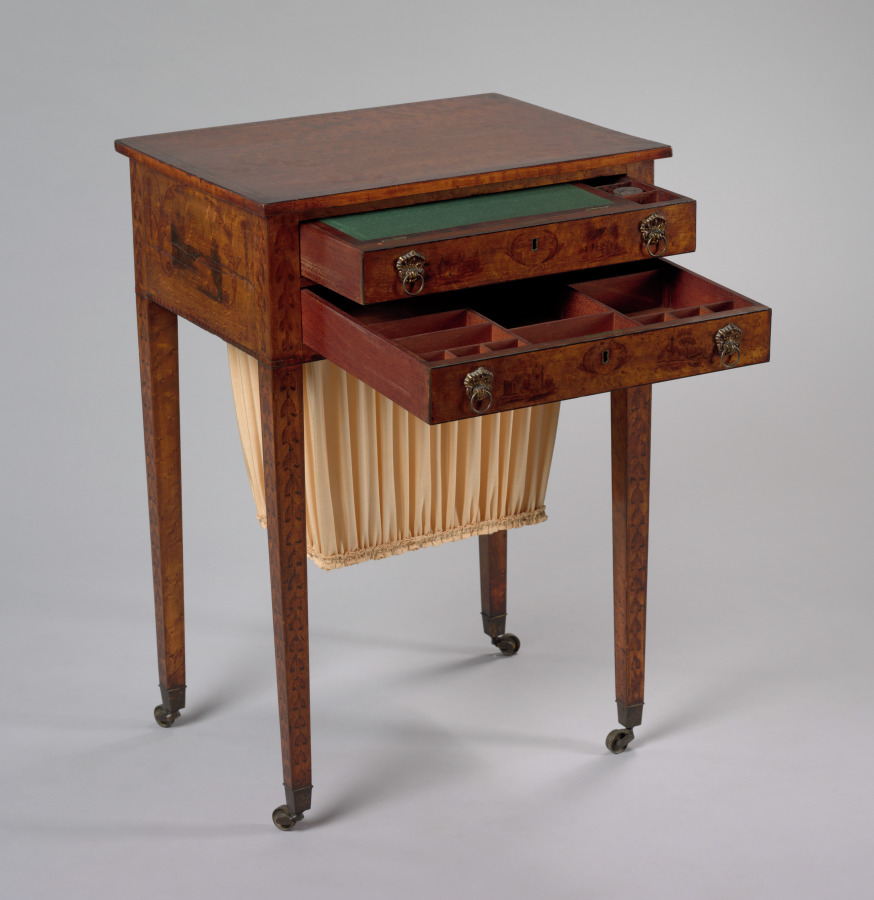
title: Work Table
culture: America, Massachusetts, Boston, 19th century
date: 1800–1825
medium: maple, brass hardware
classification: Furniture and woodwork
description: Needlework typically occupied several hours of a well-to-do woman's day. Worktables are compact, lightweight, and therefore portable. Casters permitted one to move the table around a room and to reposition it easily for sewing or writing. The top drawer of this example was designed to hold writing equipment and contains a writing tablet that could be placed at a convenient slant. The second drawer is divided into compartments for sewing equipment. Needlework was stored in a bag below, accessible by pulling its frame out of one of the table's shorter sides. This simple, small table with its slender, tapered legs is decorated with painted landscapes almost certainly copied from engravings. From about 1800–1825 furniture decoration of this kind was taught in schools for proper young ladies of New England.